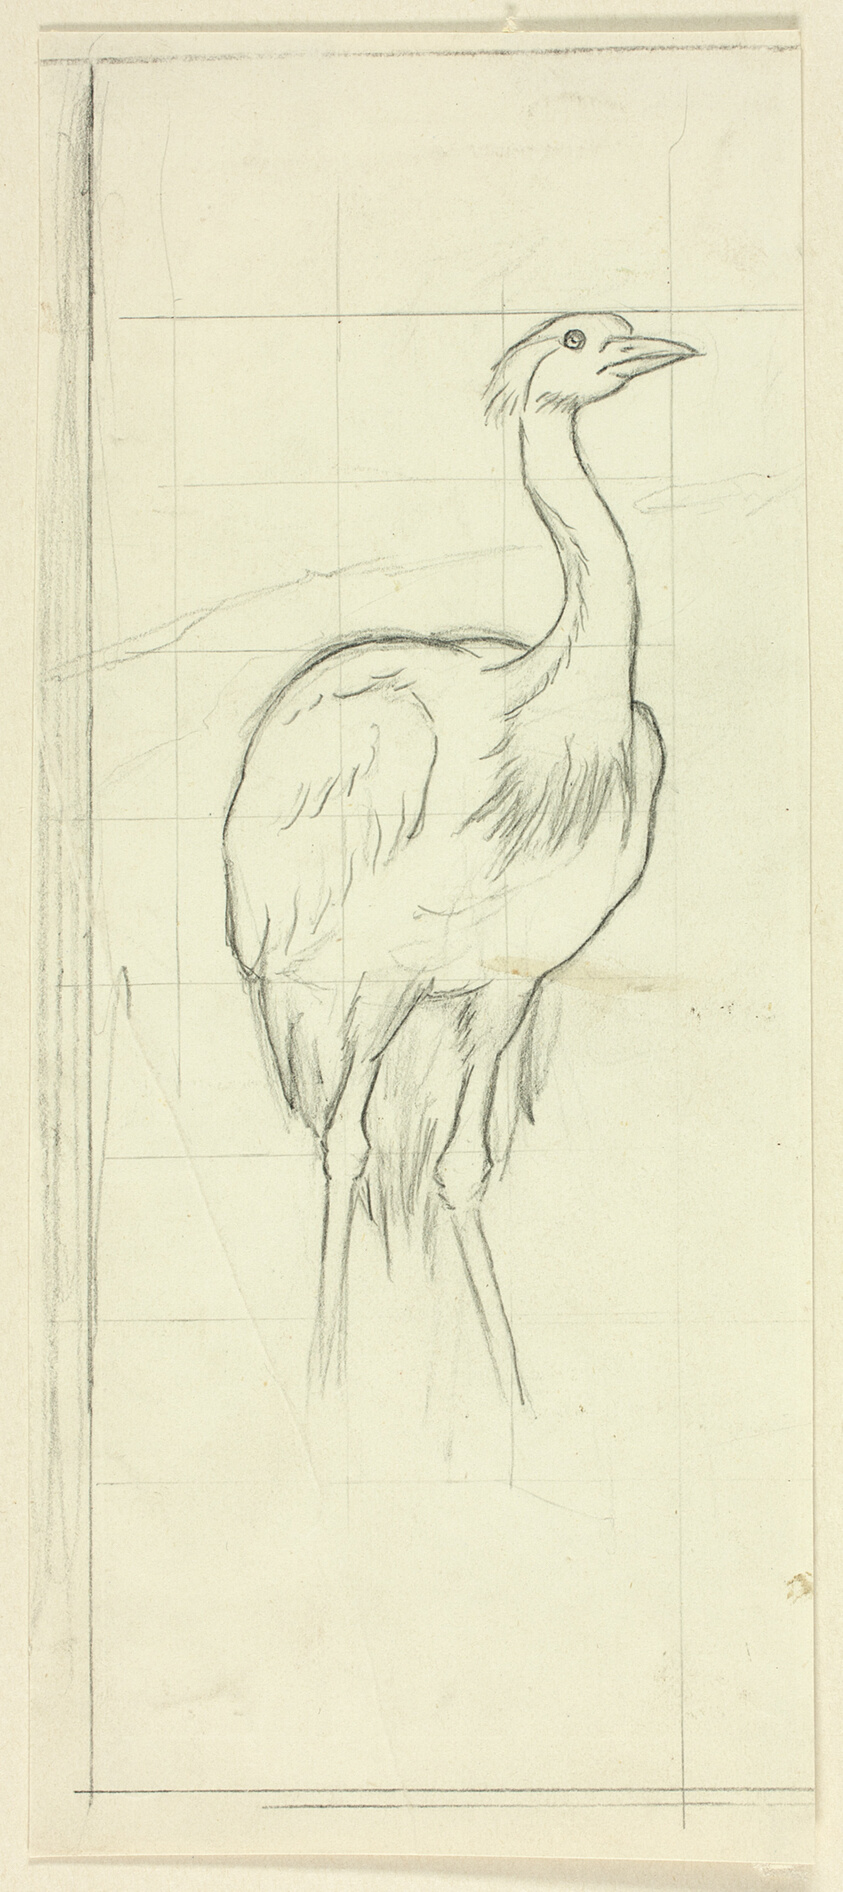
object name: Drawing and Watercolor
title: Standing Bird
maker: Henry Stacy Marks (English, 1829-1898)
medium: Graphite, squared, on ivory wove paper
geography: England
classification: graphite; drawings (visual works); prints and drawing